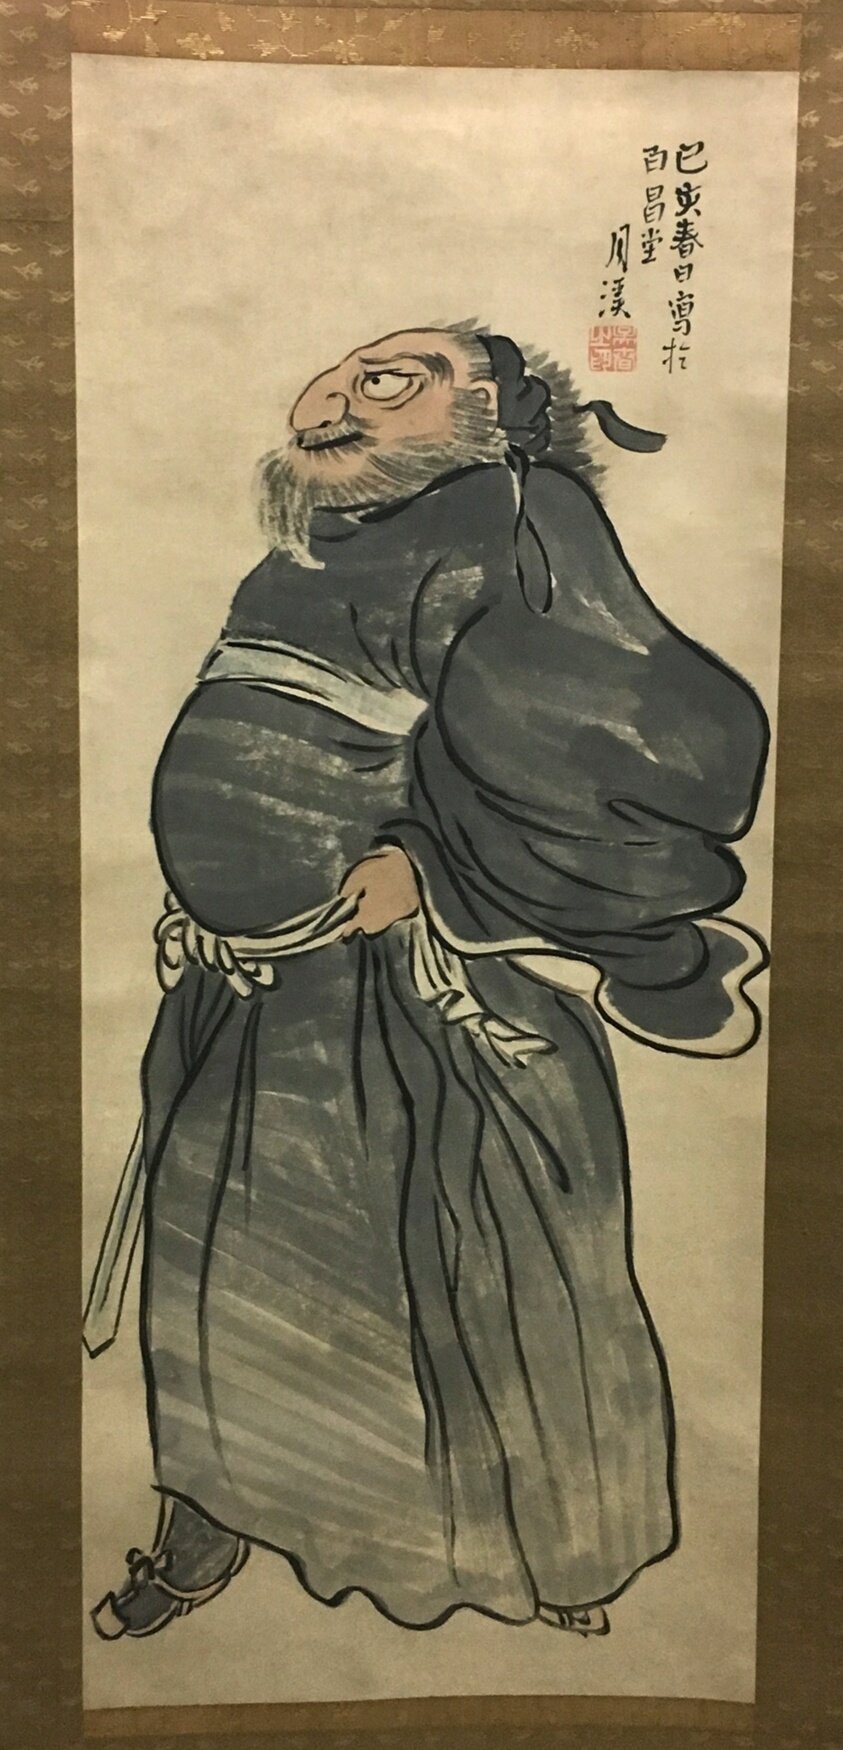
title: Shoki the Demon Queller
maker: Matsumura Goshun (Japanese, 1752-1811)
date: 17th to 19th century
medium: Hanging scroll; ink and color on paper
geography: Japan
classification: hanging scroll; painting; asian art